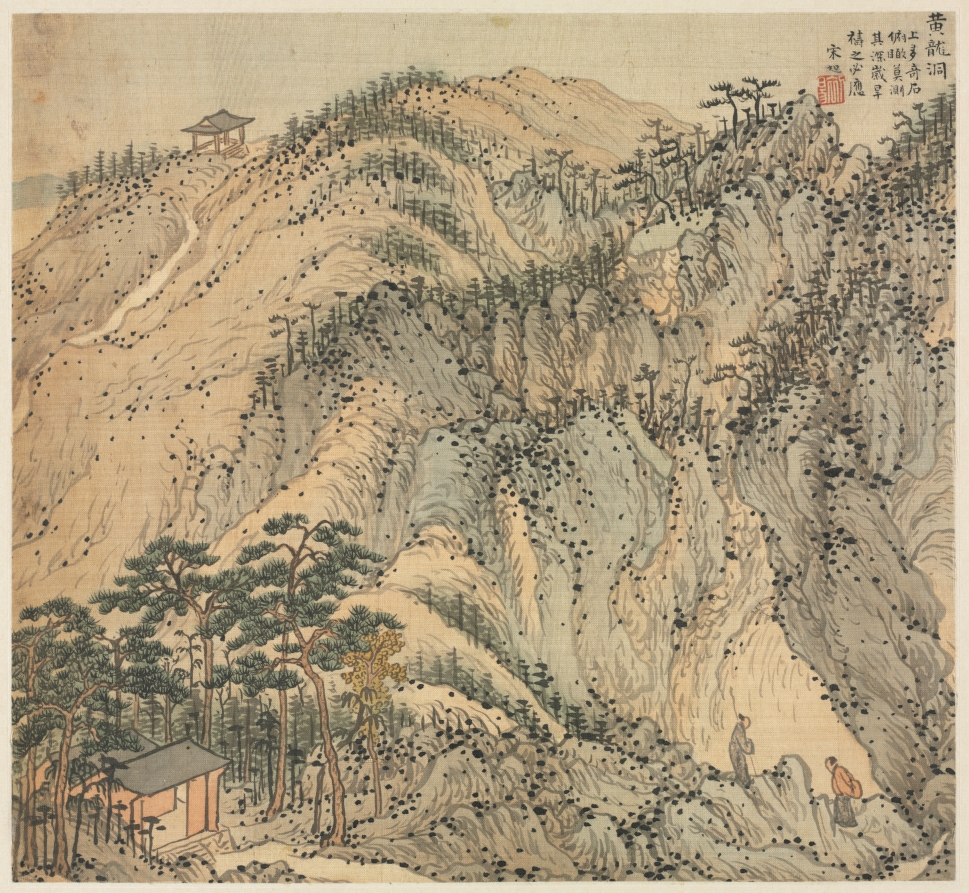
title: Huanglong Cave (Yellow Dragon Cave)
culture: China, Jiaxing, Ming dynasty (1368–1644)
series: Eighteen Views of Huzhou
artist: Song Xu (Chinese, 1525-c. 1606)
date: c. 1588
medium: Album leaf; ink and color on silk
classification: Painting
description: By the 1500s, visits to historic and scenic sites in the lower Yangzi delta stimulated an increase of printed illustrated travel books. Topographical depictions of local scenery flourished. Leaves from this album illustrates sites around Lake Tai of the two adjacent counties Changxing and Wuxing (modern Huzhou). Song Xu, who lived intermittently in Jiaxing and Songjiang, must have passed through Wuxing by boat and thus knew the region. The paintings are inscribed with gazetteerlike notations, suggesting that the album was produced for clients as commemorative works, a travel guide, or for “armchair travel” (woyou) in one’s mind.